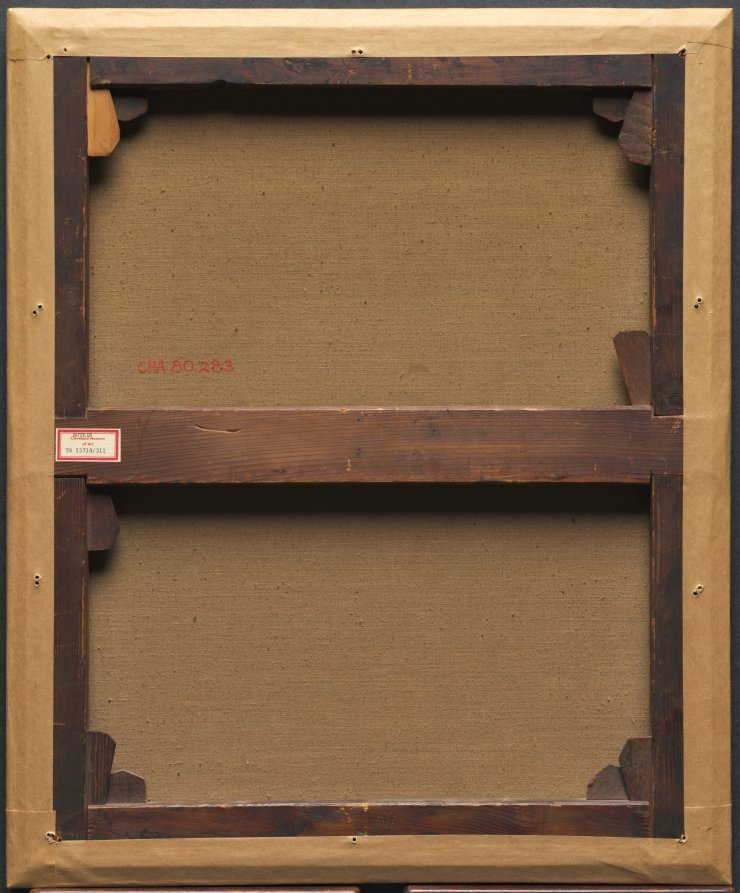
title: Italian Scene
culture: Switzerland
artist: imitator of Léopold Robert (Swiss, 1794–1835)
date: not dated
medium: oil on fabric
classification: Painting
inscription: Signed and dated lower left: Lld Robert 1831